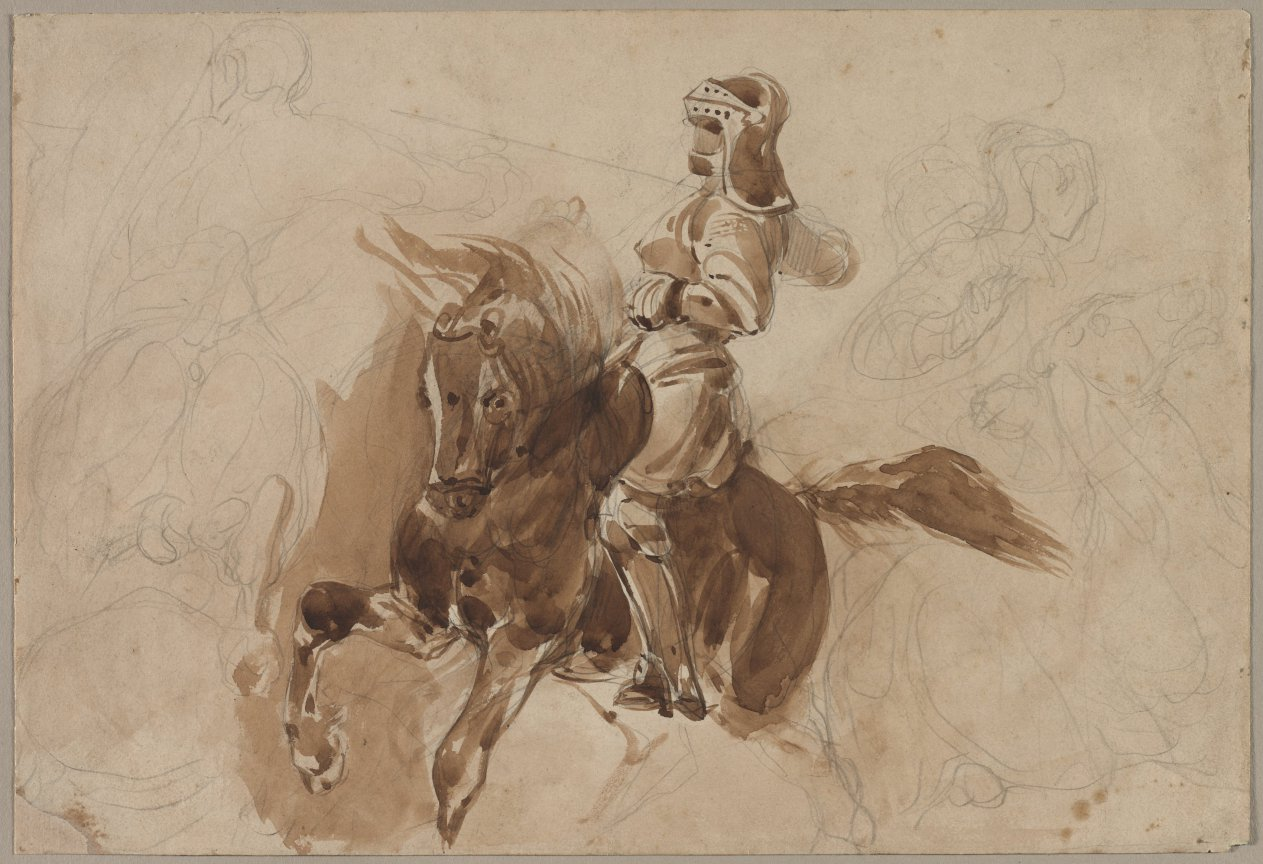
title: Armored Figure on Horseback (recto)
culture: France, 19th century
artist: Eugène Delacroix (French, 1798–1863)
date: c. 1828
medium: graphite and brush and brown wash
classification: Drawing